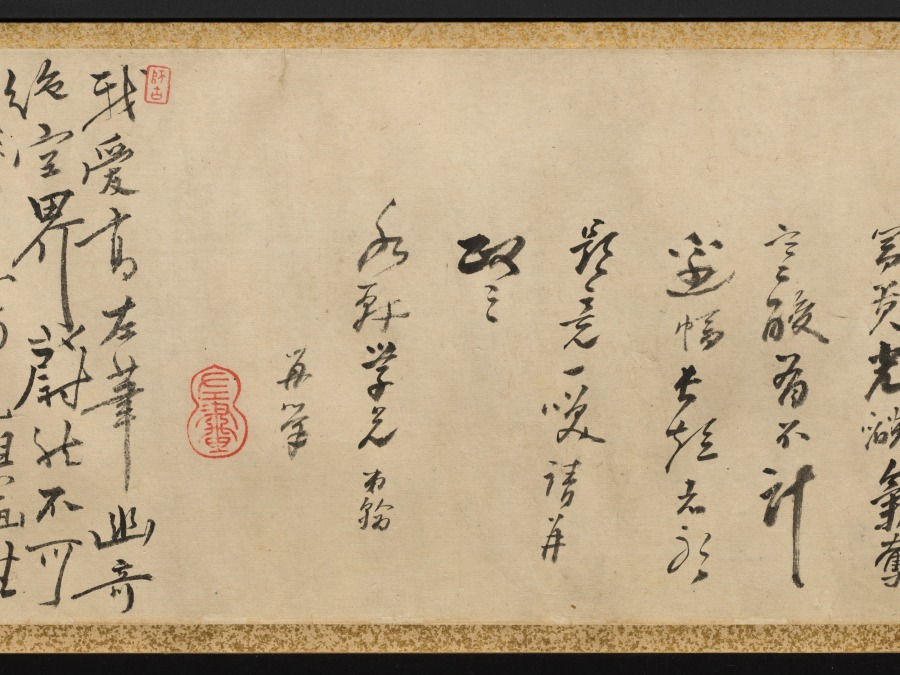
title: Plum Blossoms and Peonies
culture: China, Qing dynasty (1644-1911)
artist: Gao Fenghan (Chinese, 1683–1749)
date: 1741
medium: handscroll, ink on paper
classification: Painting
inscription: Artist's 2 inscriptions and 9 seals (the painting of Peonies with the artist's colophon and the colophon by Hou Chia-fan are on a single sheet of paper). Artist's inscription and 2 seals (Plum Blossoms): [seal] Ts'ai-yün. After finishing writing my colophon, I unrolled the painting to take another look, and it now seems that the composition here should have moved to the later part of the scroll. If that is the case, then the "Cool Beauty" [prunus] of the Solitary Hill is after all unable to take precedence over the "King of Flowers" [peony]. A laugh. Lao-fou inscribed. [seal] Feng-han. Artist's colophon (Plum Blossoms): [3 seals] Tun; Yen-yün-kung-yang, Hou-shang-tso-sheng. A few days after I painted this scroll for Shui- hsien [Yüeh Meng-yüan], the plum blossoms were in full bloom at his residence. He invited me over to enjoy them together for a long while, and I composed two additional poems and wrote them down here for his criticism. [Poems on the colophon are not translated.] First month, twenty-first day, your junior, Kao Feng-han of Nan-fou drafted this with the left hand. [seal] Feng-han. Artist's inscription and 4 seals (Peonies): Brushed with the left hand in the hsin-yu year [1741]. [seal] Yu-hsi. [3 seals at end of painting] Hou-shang-tso-sheng; Yen-yün-kung-yang; Shih-tsao-wu. Artist's colophon and seal (Peonies): The imperial concubine from the Yang family loved to dress in red, And from the emperor won the title of Hai-t'ang. But ever since she became the new dream of the moon palace, She changed into rainbow colors, while learning to dance. After I wrote the poem on Looking for Plum Blossoms in the Teng-wei Mountains, I attached to it a few branches of prunus, some bamboo tips and a piece of rock, with a scattering of green [moss] here and there to fill up the scroll. Unexpectedly, my playful fascination [with these subjects] was still not quite satisfied, so I made up these amorous ideas and romantic images [of the peony], to follow the footsteps of the fair lady of the Ku-hsieh Mountain [prunus]. Furthermore, I picked out one poem to be my vanguard. Perhaps such luminosity of wealth and power will be enough to overwhelm the poor fellows, and [they] will not mind the comparatively short length [of paper] assigned to it. Amusingly inscribed. Please correct me again. To Shui-hsien, my learned senior, your junior Han inscribed again. [seal] Tso-hua [left-handed painting]. 1 additional colophon and 5 additional seals: 1 colophon, dated 1742, and 3 seals of Hou Chia-fan (act. ca. 1742); 1 seal of P'u Ch'üan (20th c.?); 1 seal of Li family (dates unknown).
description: One of the so-called Yangzhou Eccentrics (a group of painters who lived in Yangzhou and were known for their unorthodox art and lifestyle), Gao Fenghan depicts China’s two most loved flowers in full bloom—the “cold beauty,” or plum blossom, in the first section, and the “king of flowers,” or peony, in the second section. Painted in 1741, the year when Gao decided to leave the south and return home to Shandong province in eastern China, this work was likely a token of farewell. His casual brushwork may indicate his mental and physical struggle at the time. After having crippled his right hand in 1737, Gao used his left hand to paint and achieved a crudeness and eccentric style unattainable before.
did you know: In East Asian art, peonies traditionally symbolize prosperity and wealth.